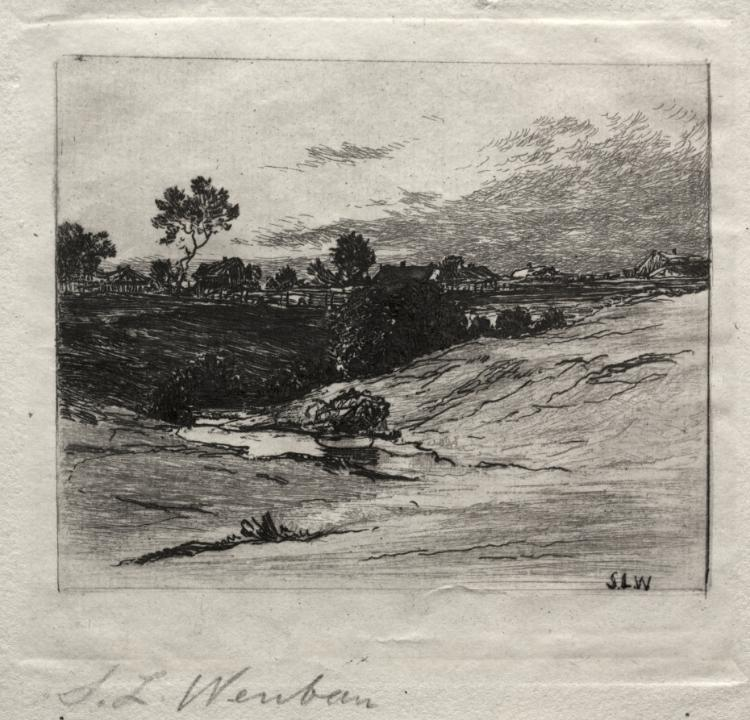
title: Landscape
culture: America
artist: Sion Longley Wenban (American, 1848–1897)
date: c. 1880s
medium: etching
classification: Print